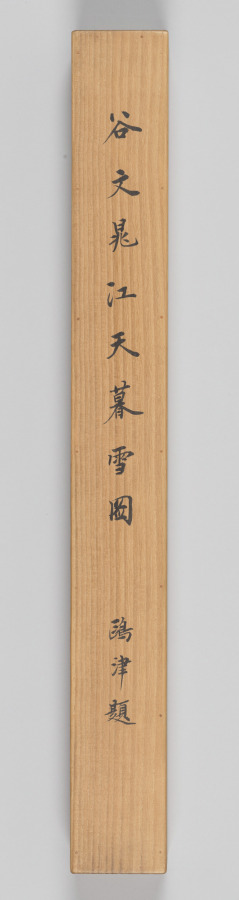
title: Evening Snow Blending River and Sky, from Eight Views of Xiao-Xiang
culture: Japan, Edo period (1615–1868)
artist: Tani Bunchō (Japanese, 1763–1841)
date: 1788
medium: album leaf remounted as a hanging scroll; ink and color on paper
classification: Painting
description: This painting was part of a set of album leaves representing the Eight Views of Xiao-Xiang, a theme originating in Chinese poetry and painting that spread to both Korea and Japan. Southern China’s Xiao-Xiang area, where the mist-covered banks of the Xiang River created a complex landscape shifting like the moods and minds of people, captured the imaginations of generations of painters and calligraphers. Inscriptions on these works suggest that they were possibly ordered by newly prominent Japanese Confucian scholars.